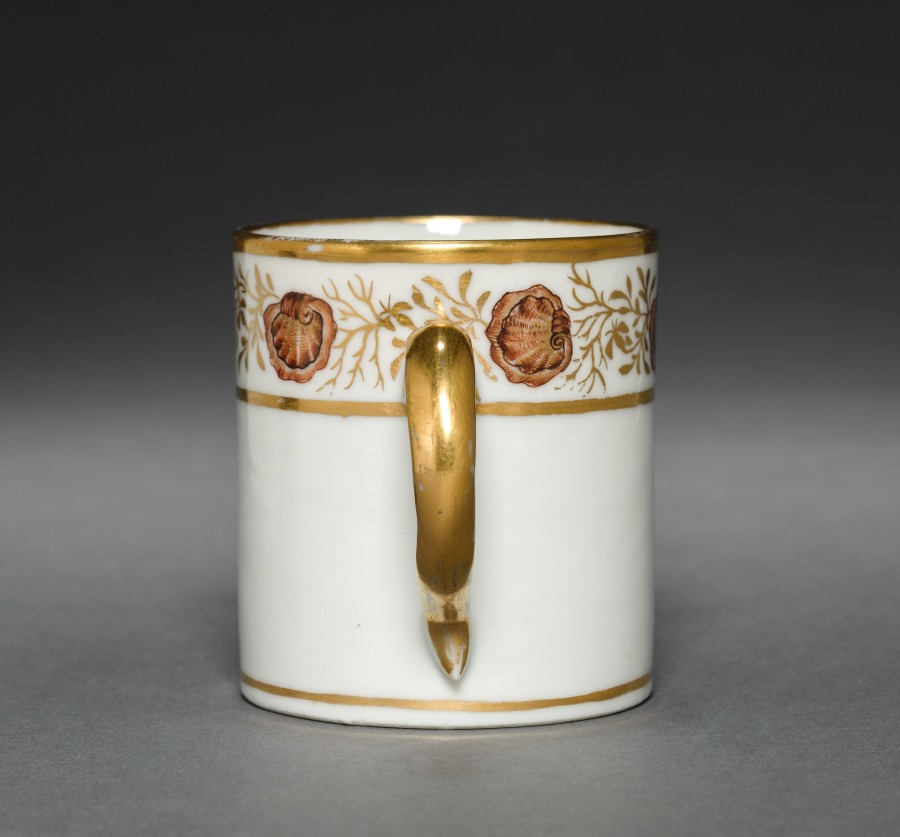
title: Cup from Oliver Wolcott, Jr. Tea Service (5 of 6)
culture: Chinese Export porcelain, late 18th-early 19th century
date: 1785–1805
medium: porcelain, sepia enamel, gold leaf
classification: Ceramic